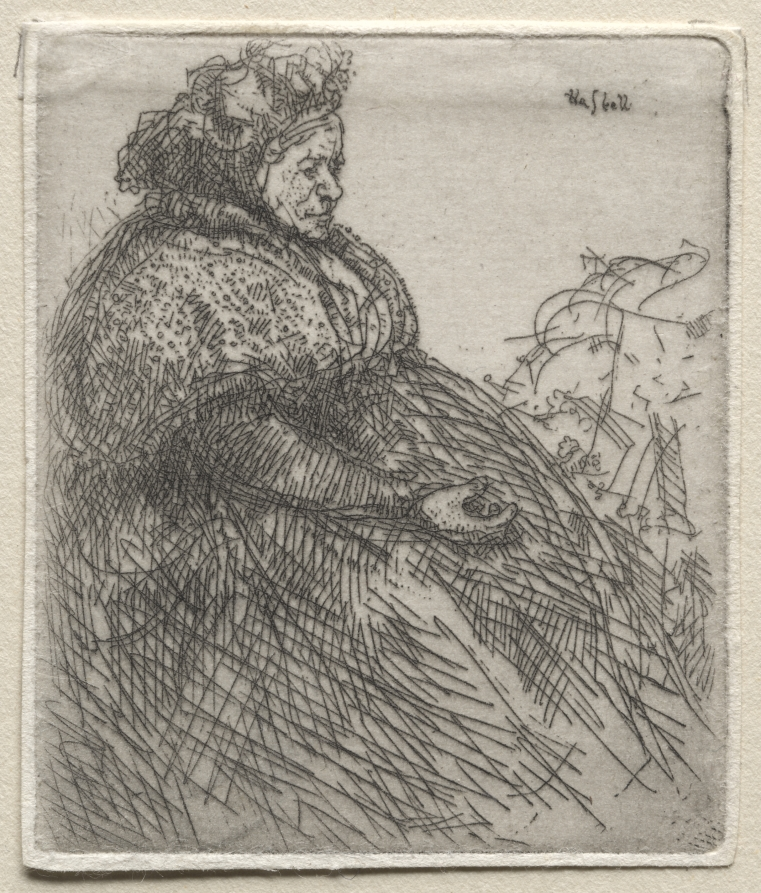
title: Paris: Ribbon Vender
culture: America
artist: Ernest Haskell (American, 1876–1925)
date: 1910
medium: etching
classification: Print